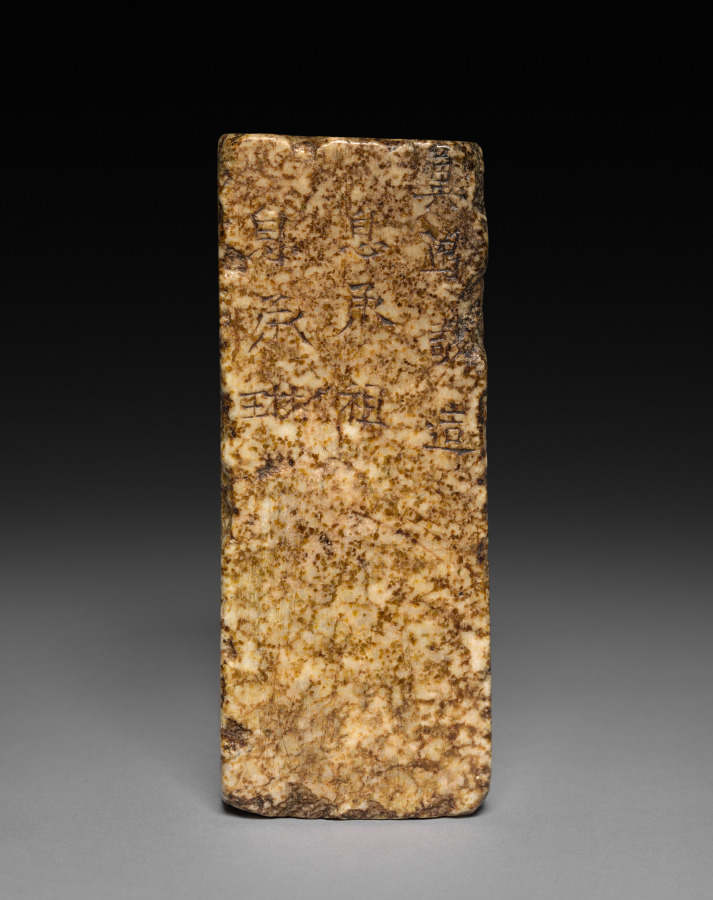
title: Sakyamuni Preaching: A Votive Stele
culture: China, Northern Dynasties period (386–581 CE), Northern Zhou (557-581)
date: c. 565 BCE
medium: Serpentinite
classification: Sculpture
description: The stele shows the historic Buddha Sakyamuni preaching, his lotus throne being flanked by lions, two attendants, and two disciples. There is a date and inscriptions on both sides of the stone.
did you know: Originally the figures and background were painted; traces of red and black remain. The figures’ clothing and some exposed skin were gilded.